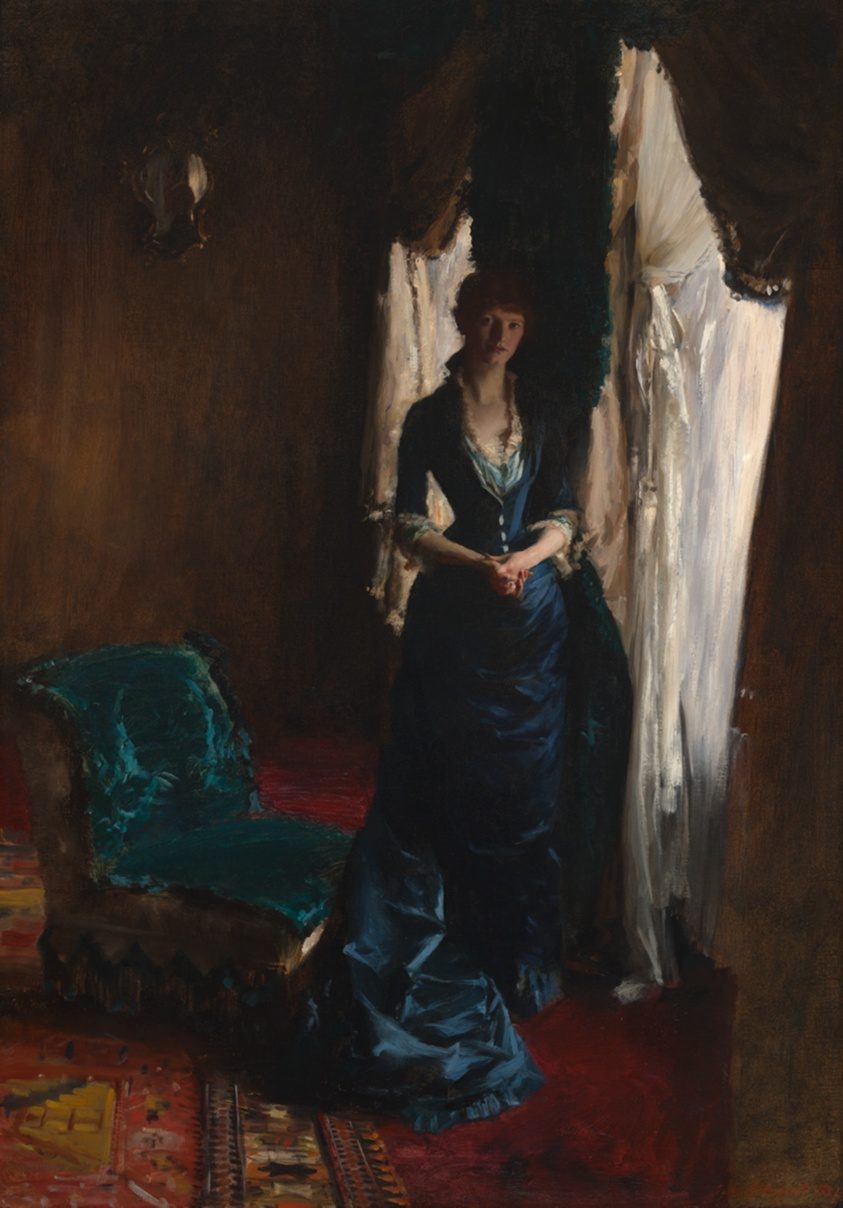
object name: Painting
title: Madame Paul Escudier (Louise Lefevre)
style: Impressionism, Realism, Modernism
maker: John Singer Sargent (American, 1856–1925)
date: 1882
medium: Oil on canvas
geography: United States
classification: oil on canvas; painting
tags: portraits, Chicago, fashion, people